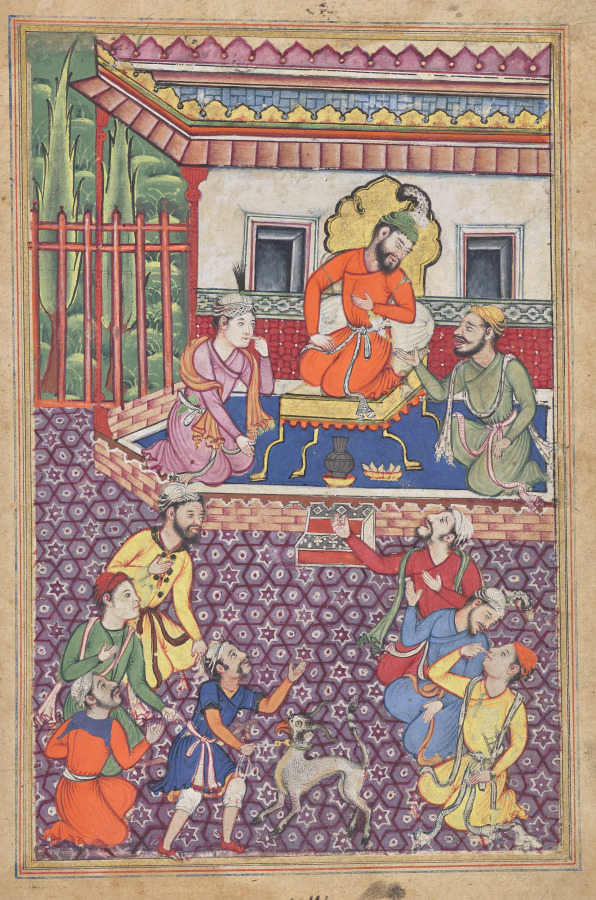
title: The court of the Raja of Ujjain, from a Tuti-nama (Tales of a Parrot): Forty-sixth Night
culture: Mughal India, court of Akbar (reigned 1556–1605)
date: c. 1560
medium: gum tempera, ink, and gold on paper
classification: Painting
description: When out hunting, the formidable raja of Ujjain captured a fantastic animal and brought it back to his court. It is described as being so soft that the fur of his body “made the back of the sable seem as hard as stone and the smoothness of whose coat made the fur of the ermine feel like the anvil of a blacksmith.” In devising this wondrous creature’s appearance, the artist gave him cloven hoofs, a beak, and horns, as though inspired by European images of griffins, but with soft-looking fur.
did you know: The artist of this folio attempted to make the windows on the back wall appear three dimensional.